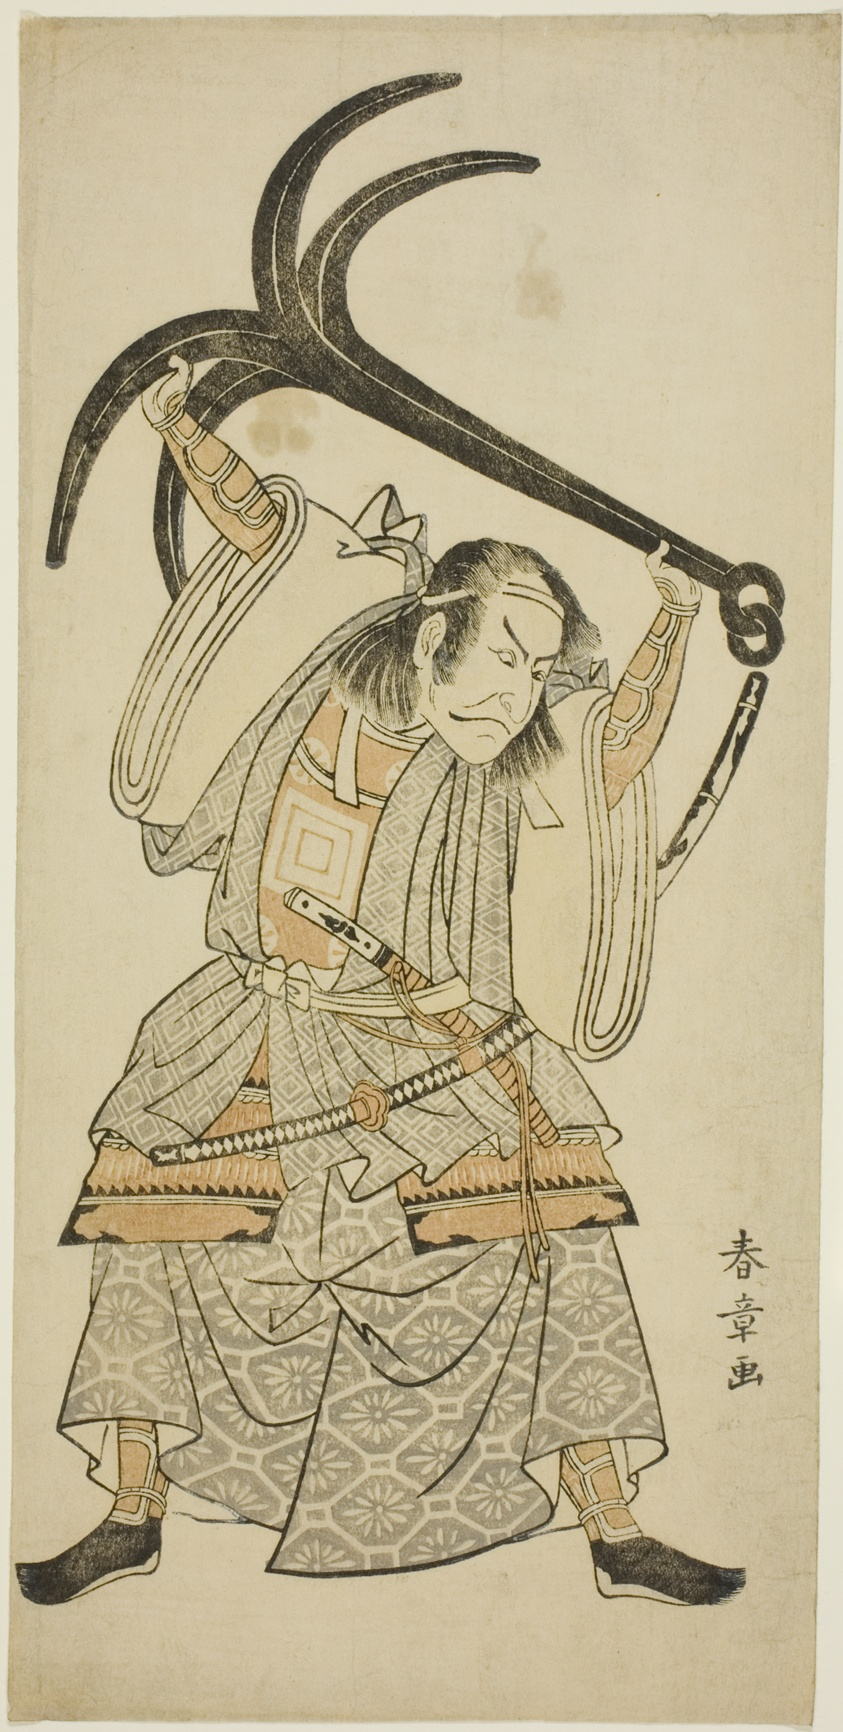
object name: Print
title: Actor Ichikawa Danjûrô IV as Taira no Tomomori Disguised as Tokaiya Gimpei in “Yoshitsune’s Thousand Cherry Trees” (“Yoshitsune sembon-zakura”)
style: Japanese (culture or style)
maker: Katsukawa Shunshô 勝川 春章; Japanese, 1726-1792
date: About 1767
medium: Color woodblock print; hosoban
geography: Japan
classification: woodblock print; print; asian art